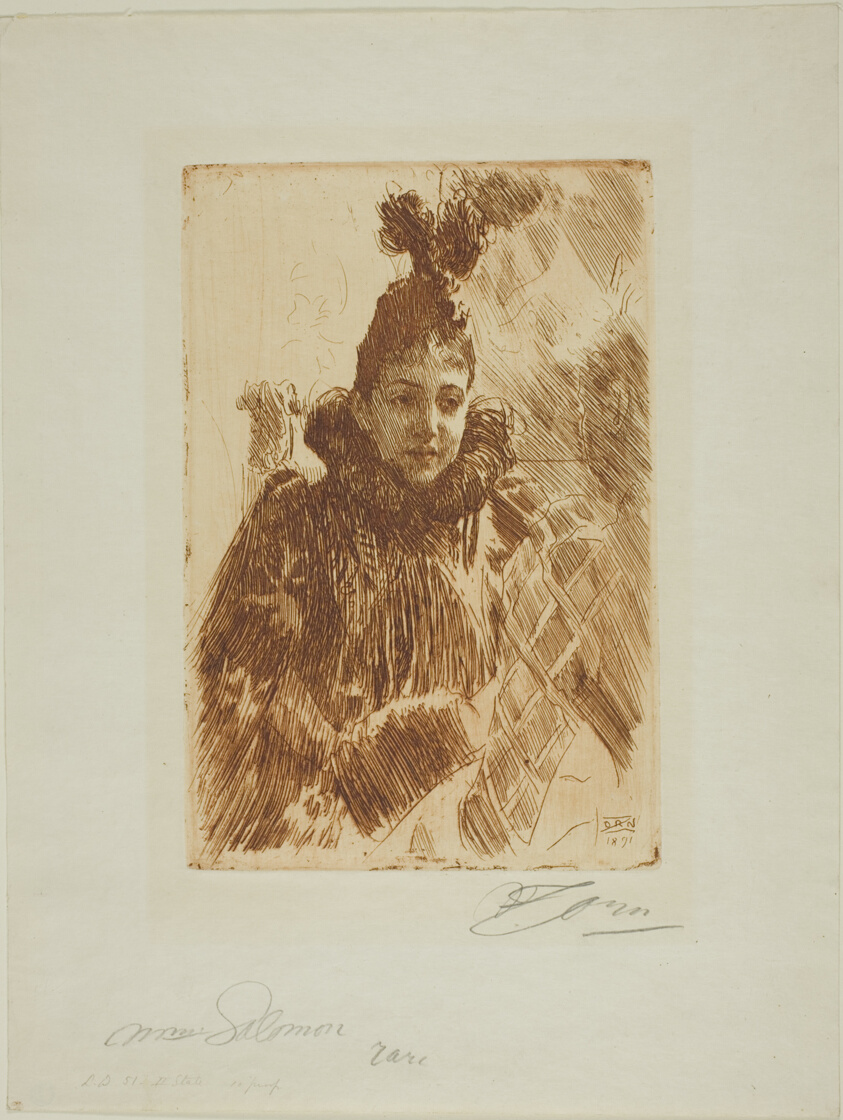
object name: Print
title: Mme Salomon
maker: Anders Zorn (Swedish, 1860-1920)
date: 1891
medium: Etching, with red ink, on ivory wove paper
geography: Sweden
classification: etching; print; prints and drawing